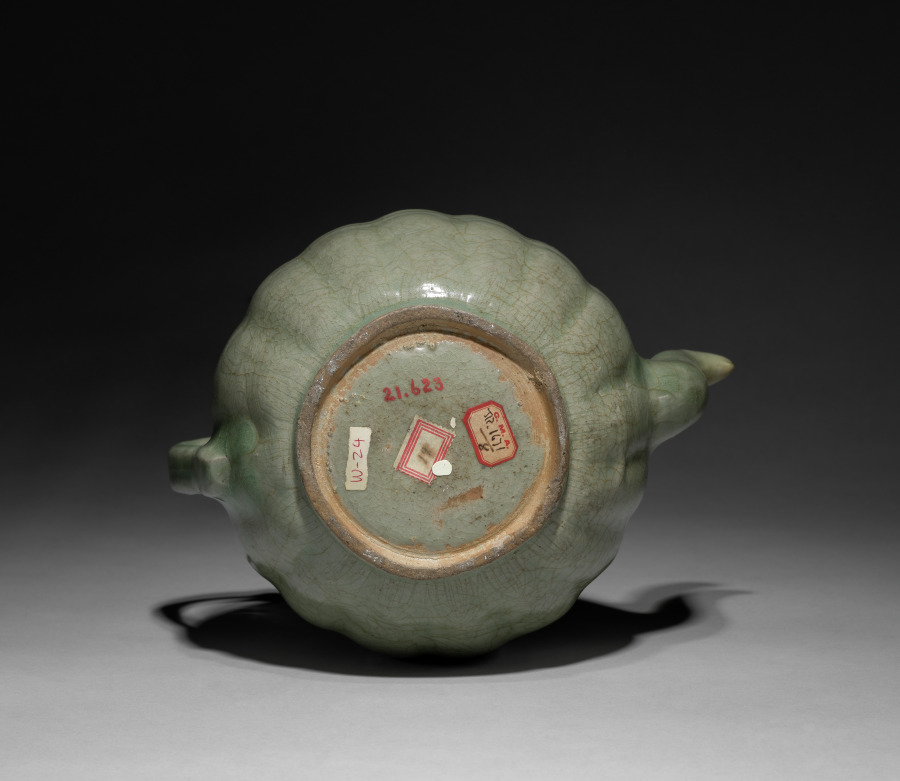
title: Wine Pot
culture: Korea, Goryeo dynasty (918–1392)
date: 918–1392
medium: pottery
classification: Ceramic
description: As early as the seventh century, the practice of drinking tea and wine became an important part of elite culture in Korea. Elites of the Goryeo period commissioned a variety of types of utensils and vessels including this elegant pot, not only to make their drinking experience more exciting, but also to show their appreciation of nature.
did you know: Originally the lid was not coupled with this pot.